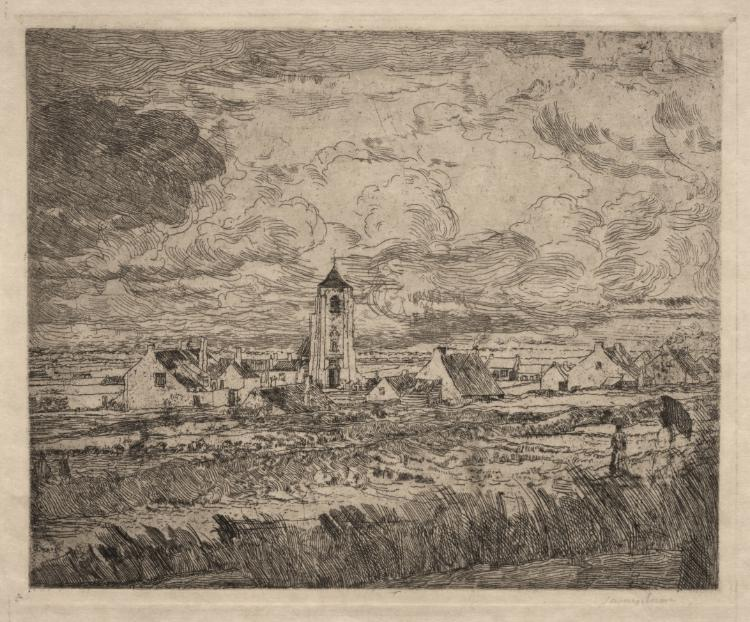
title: Large View of Mariakerke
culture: Belgium, 19th-20th century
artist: James Ensor (Belgian, 1860–1949)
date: 1887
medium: etching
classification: Print